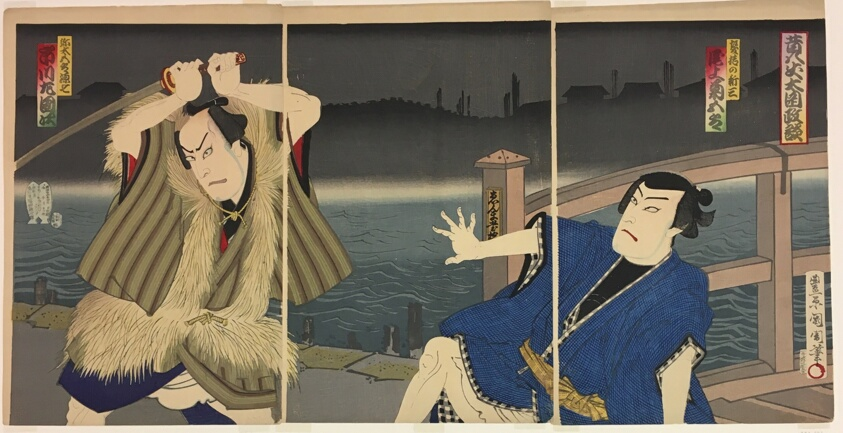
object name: Print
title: The Actors Onoe Kukugoro V as Shinzp and Ichikawa Sadanji I as Yatagoro Genshichi.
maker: Toyohara Kunichika (Japanese, 1835-1900)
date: 1893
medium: Color woodblock print, oban diptych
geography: Japan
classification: woodblock print; print; asian art